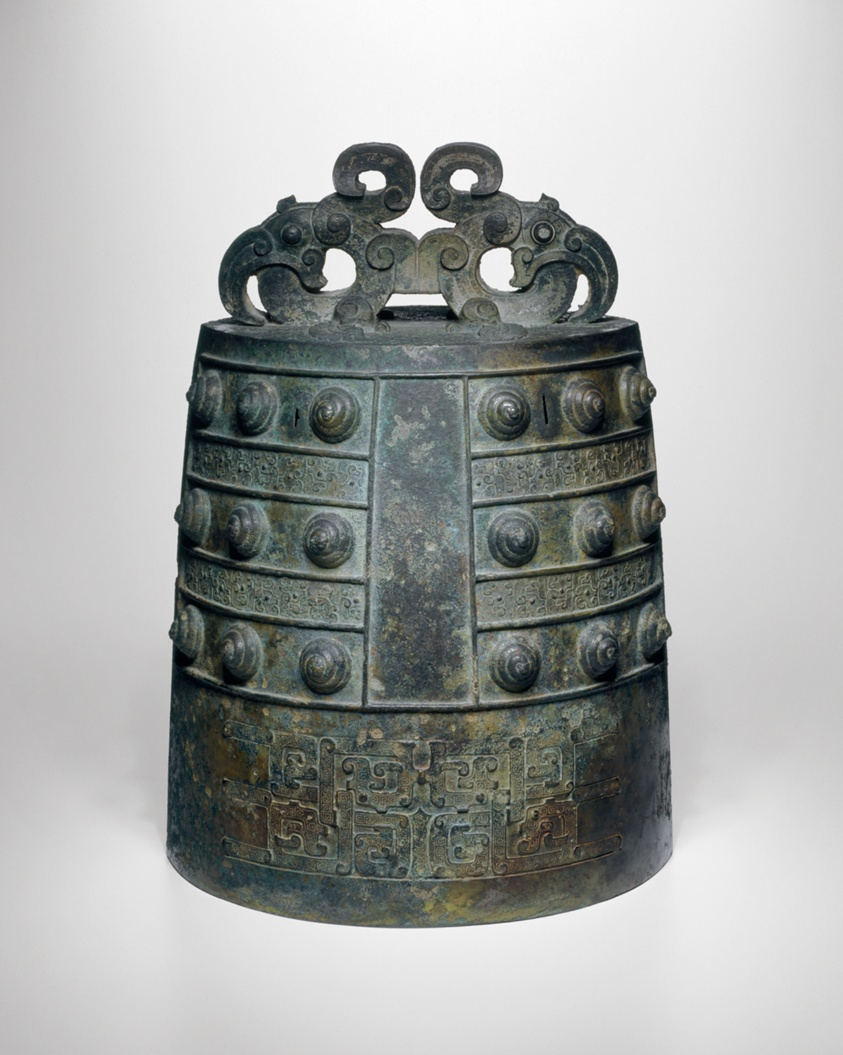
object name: Sculpture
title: Suspension Bell (Bo) 东周时期青铜镈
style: Chinese (culture or style)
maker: China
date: Eastern Zhou dynasty (770–256 B.C.), first half of 5th century B.C.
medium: Bronze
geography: China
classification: bronze; asian art; sculpture